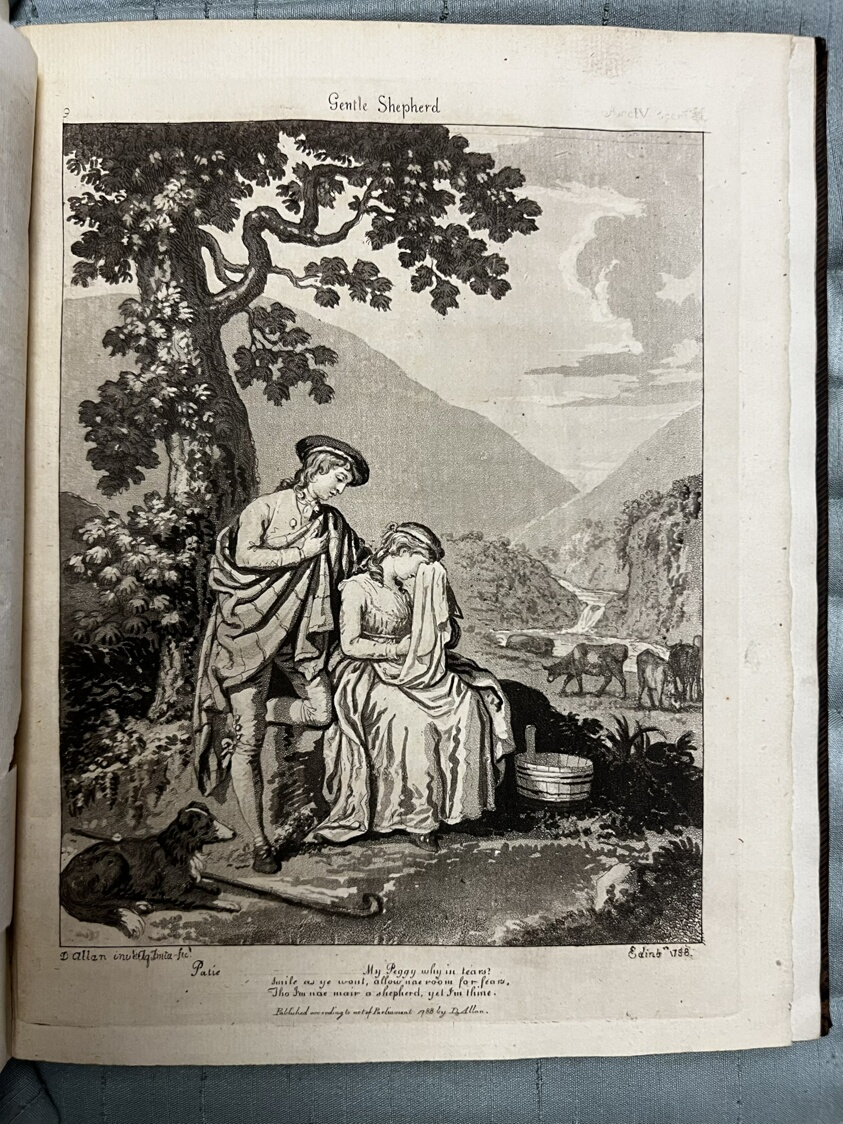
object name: Book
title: The Gentle Shepherd: a Pastoral Comedy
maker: David Allan (Scottish, 1744-1796); written by Allan Ramsay (Scottish, 1686-1758); printed by A. Foulis (Scotland, 18th century)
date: 1788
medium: Book with illustrations in etching and aquatint in black on cream laid paper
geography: Scotland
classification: book; paper; prints and drawing